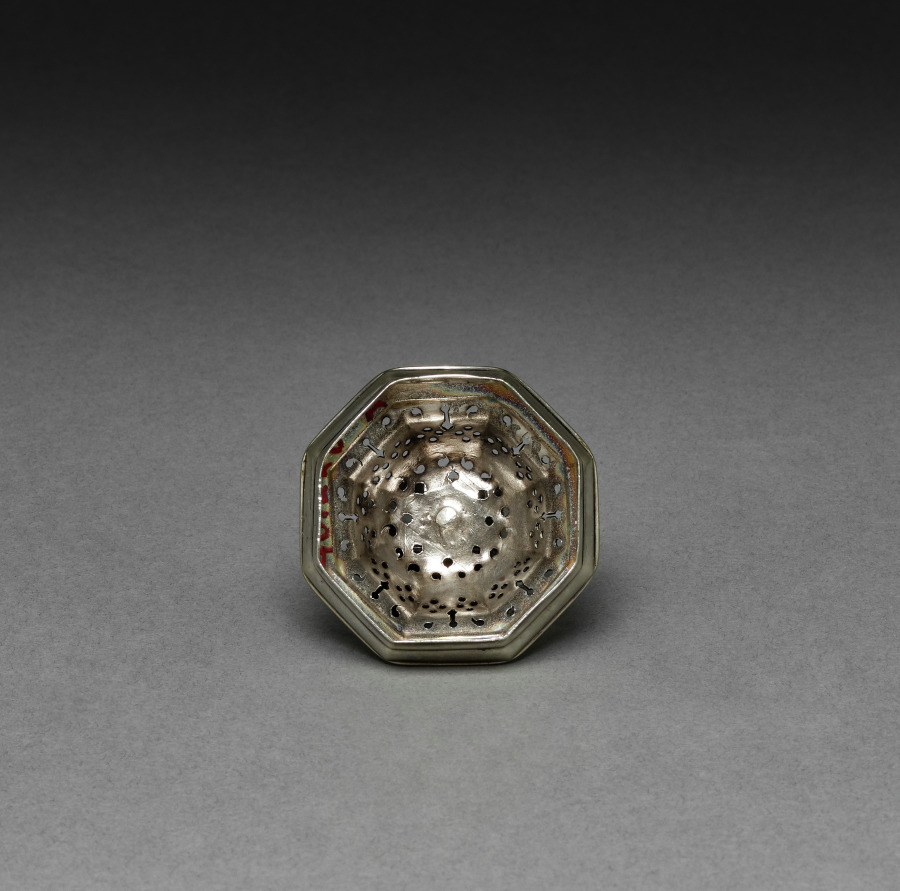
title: Caster (lid)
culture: America, Massachusetts, Boston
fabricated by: Jacob Hurd (American, 1702–1758)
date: 1743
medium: silver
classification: Silver